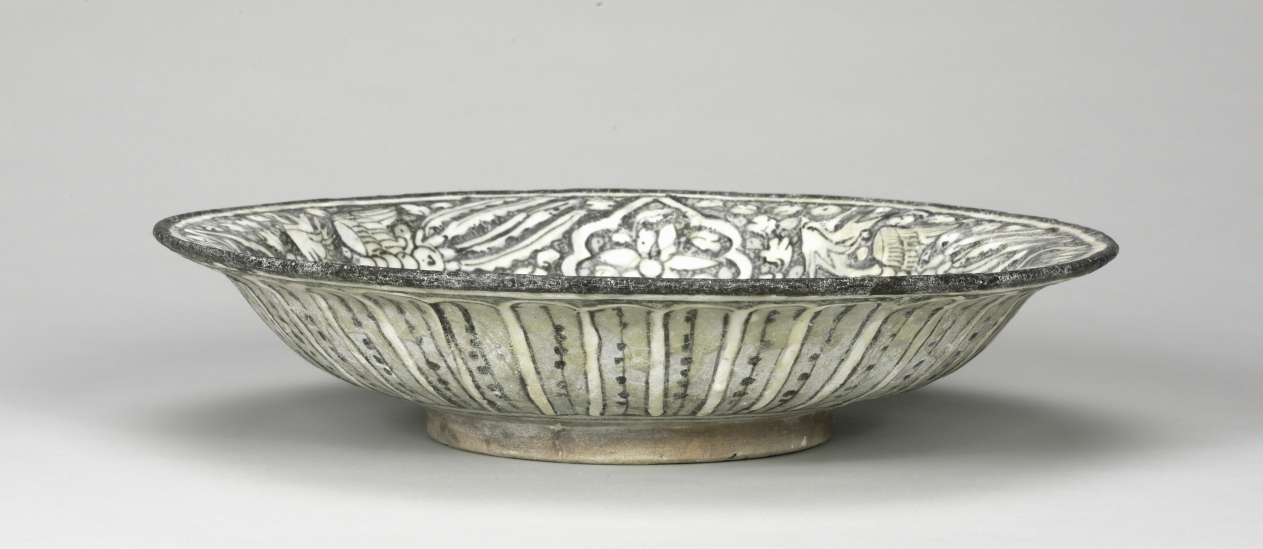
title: Ceramic dish with deer, phoenix, and lotus blossoms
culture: Iran, probably Sultanabad, Ilkhanid period (1256–1353)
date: 1300–1350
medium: Fritware with underglaze-painted design, Sultanabad ware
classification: Ceramic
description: The design of a flying phoenix on the rim was frequently represented on vessels and tilework of this period. The motif was derived from China, most likely transmitted on prestigious silk textiles.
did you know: Fritware is made of ground quartz, glass frit (partially fused glass), and a small proportion of fine white clay to approximate the light color and weight of Chinese porcelain.